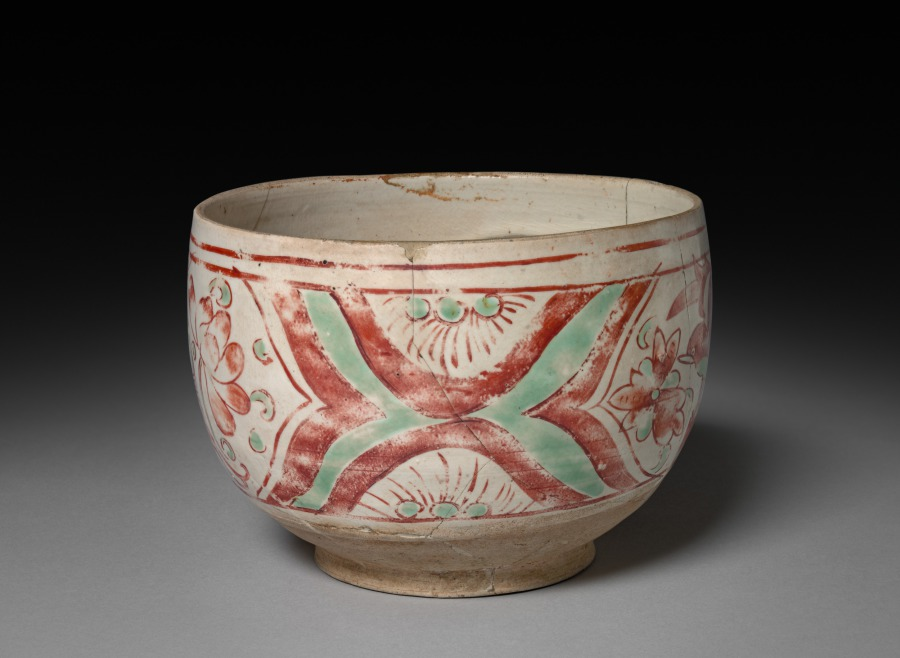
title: Bowl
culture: China, Jin dynasty (1115-1234) - Yuan dynasty (1271-1368)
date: 1200s–1300s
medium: buff stoneware with underglaze slip application and overglaze enamel decoration; Cizhou ware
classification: Ceramic